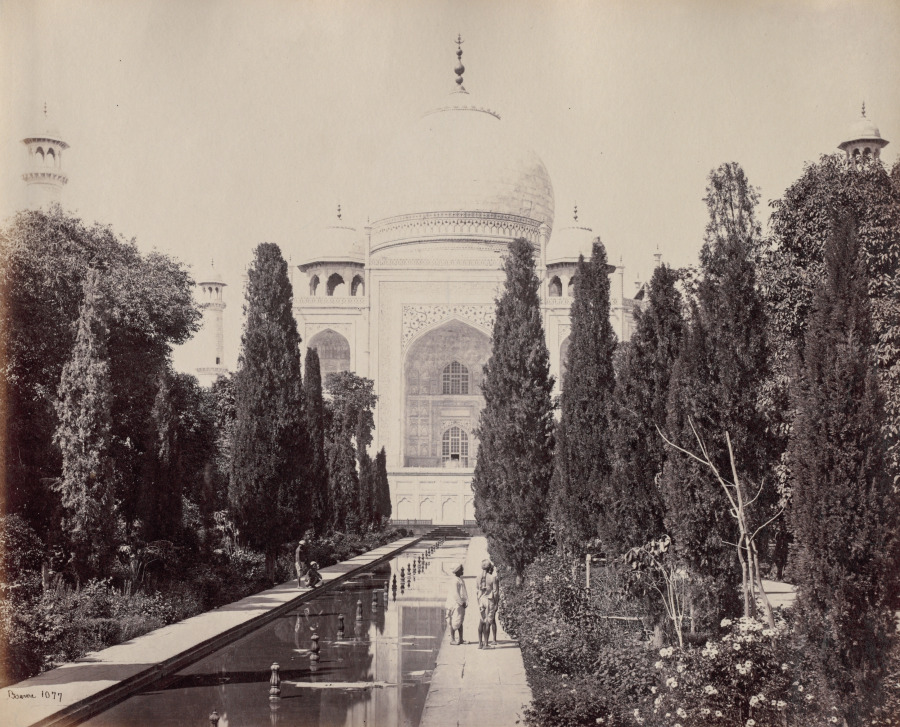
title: The Taj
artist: Samuel Bourne (British, 1834–1912)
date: c. 1860s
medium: albumen print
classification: Photograph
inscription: Imprinted in lower right corner on recto: "Bourne 1077"